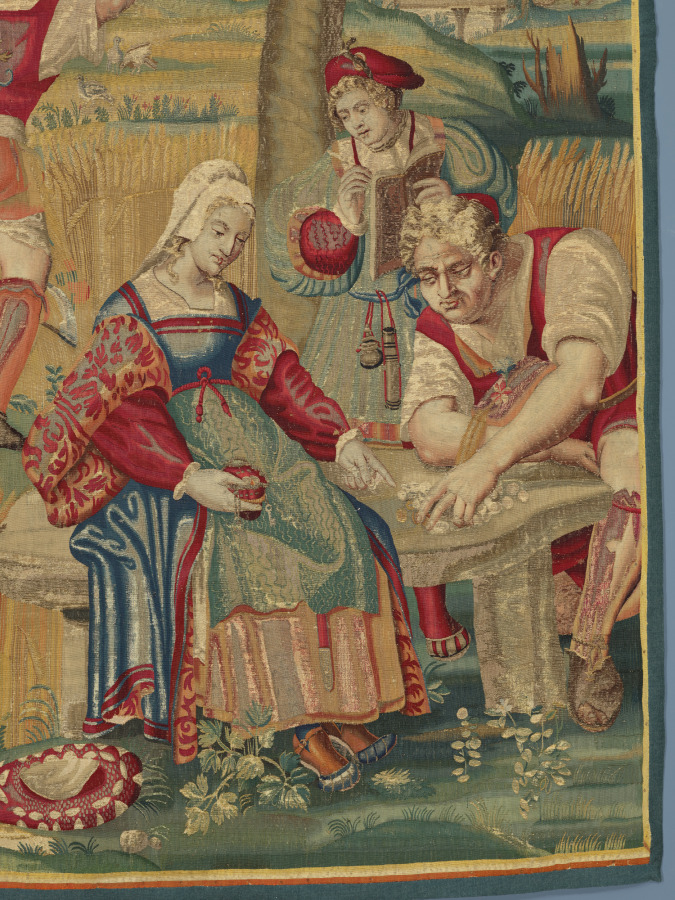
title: Summer: Harvest Scene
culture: France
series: Four Seasons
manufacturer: possibly by Gobelins Manufactory (France, Paris, est. 1662)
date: designed c. 1535, woven mid- to late 1600s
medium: Wool, silk, and gold filé: tapestry weave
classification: Tapestry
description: The wheat harvest took place in July and represented the hard, hot work of summer. The reaper in the foreground and his companion in the middle distance swing their scythes high above their heads as they prepare to cut the wheat stalks. Underneath the shade of an apple tree, three figures in the foreground are determining a price for the wheat. A woman gestures to the coins that the seated man is counting. Behind them another man holds an account book, in which he records their decisions. His pen holder and ink pot hang from his belt. In the distance to the right, two horses draw a cart piled high with wheat toward four farmers who gather bunches of wheat stalks together and tie them into bundles.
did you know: Images of the harvest provided a way to express pride in the fruitfulness and plenty of a particular region and celebrate the diligence of the field laborers.